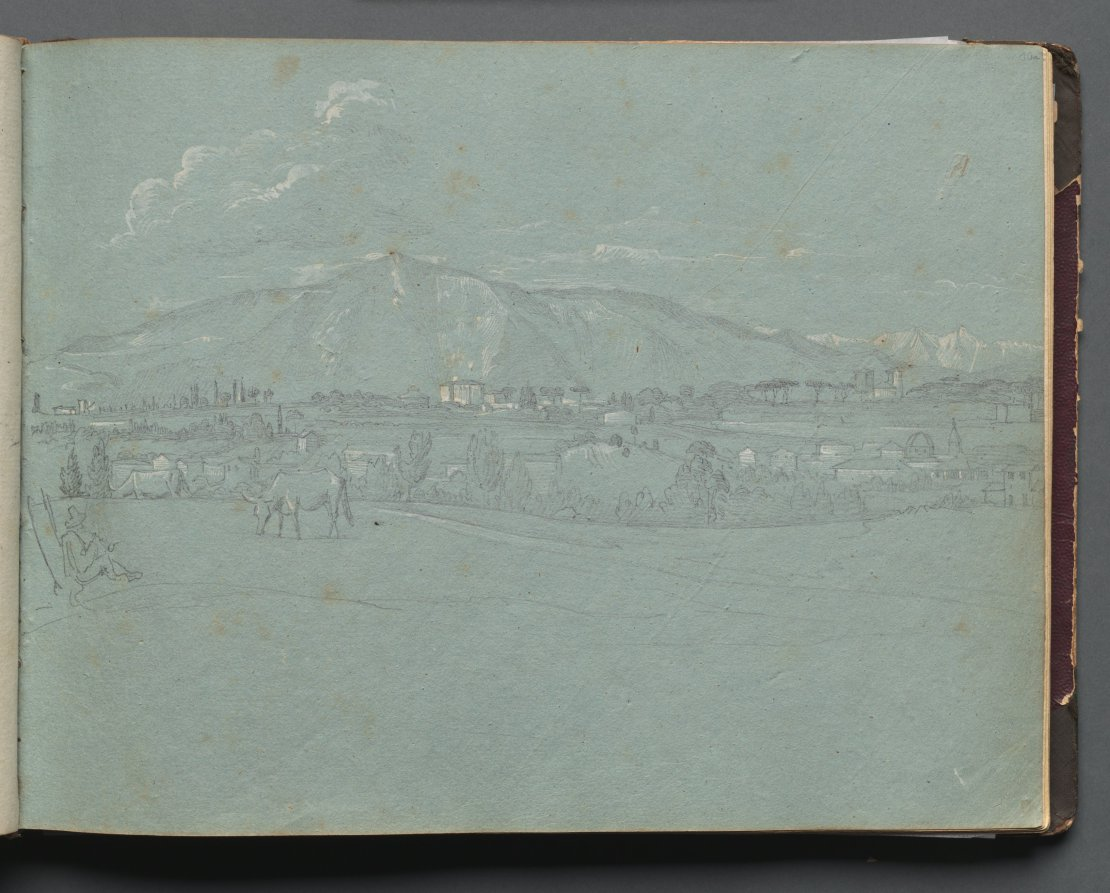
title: Album with Views of Rome and Surroundings, Landscape Studies, page 10a: Roman Landscape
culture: Germany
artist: Franz Johann Heinrich Nadorp (German, 1794–1876)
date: c. 1830s-70s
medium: graphite with white hightening on blue paper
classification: Bound Volume